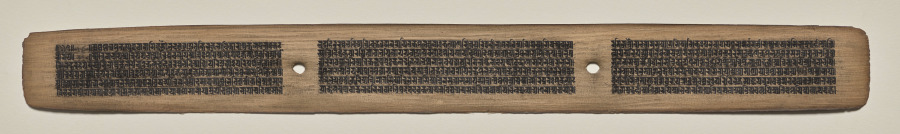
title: Text, Folio 73 (recto), from a Manuscript of the Perfection of Wisdom in Eight Thousand Lines (Ashtasahasrika Prajnaparamita-sutra)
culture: Eastern India, Bihar, Vikramashila Monastery. Painting: Nepal, Kathmandu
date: Sunday, September 14, 1119 (year 239 of the Newar Samvat in the month of Ashvina)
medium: gum tempera and ink on palm leaves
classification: Painting